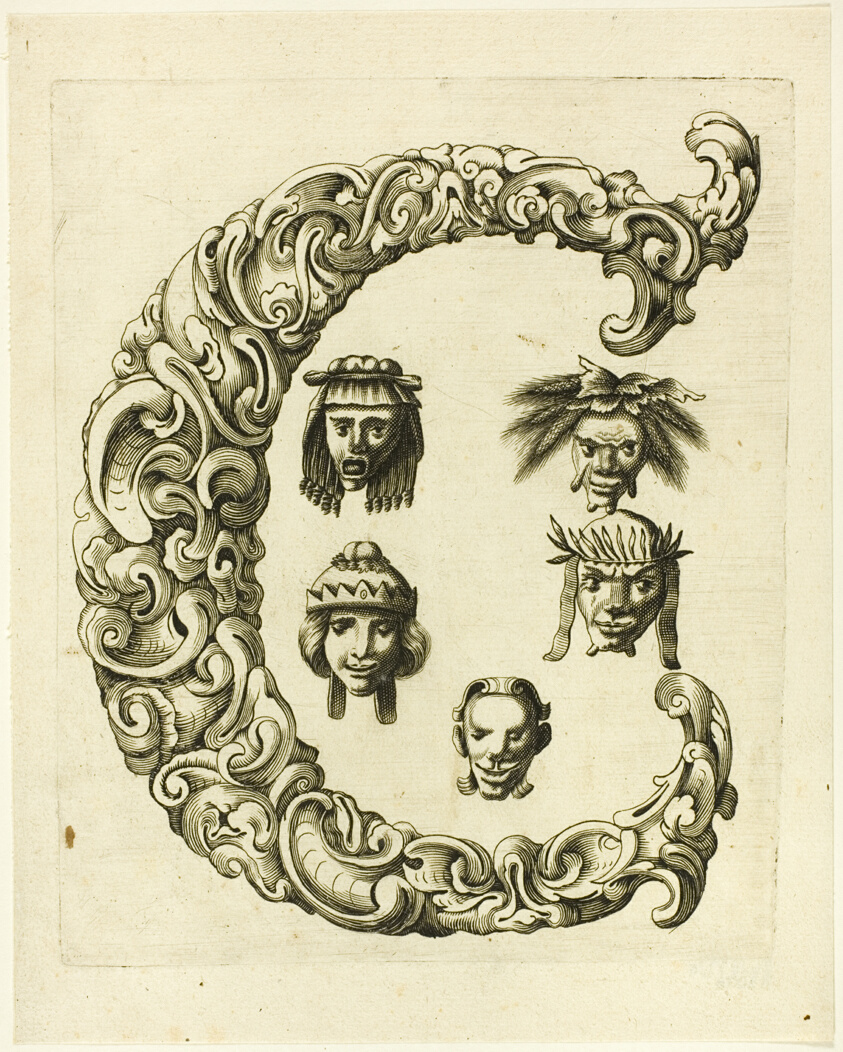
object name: Print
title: Letter C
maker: Peter Aubry (German, 1596-1668)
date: 1630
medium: Engraving on paper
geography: Germany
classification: engraving; print; prints and drawing